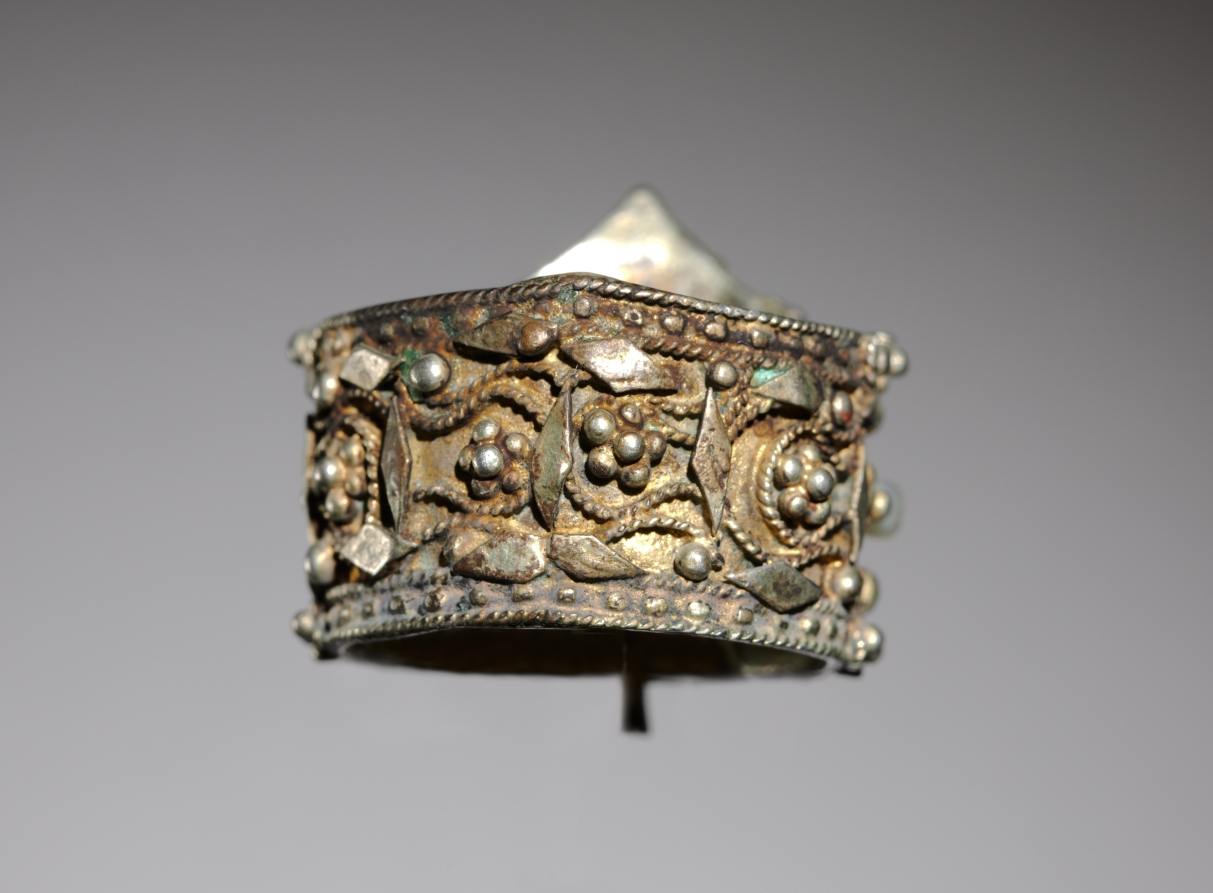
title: Ring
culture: North Africa, 19th century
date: 1800s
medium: Silver gilding, turquoise, and pearls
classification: Jewelry